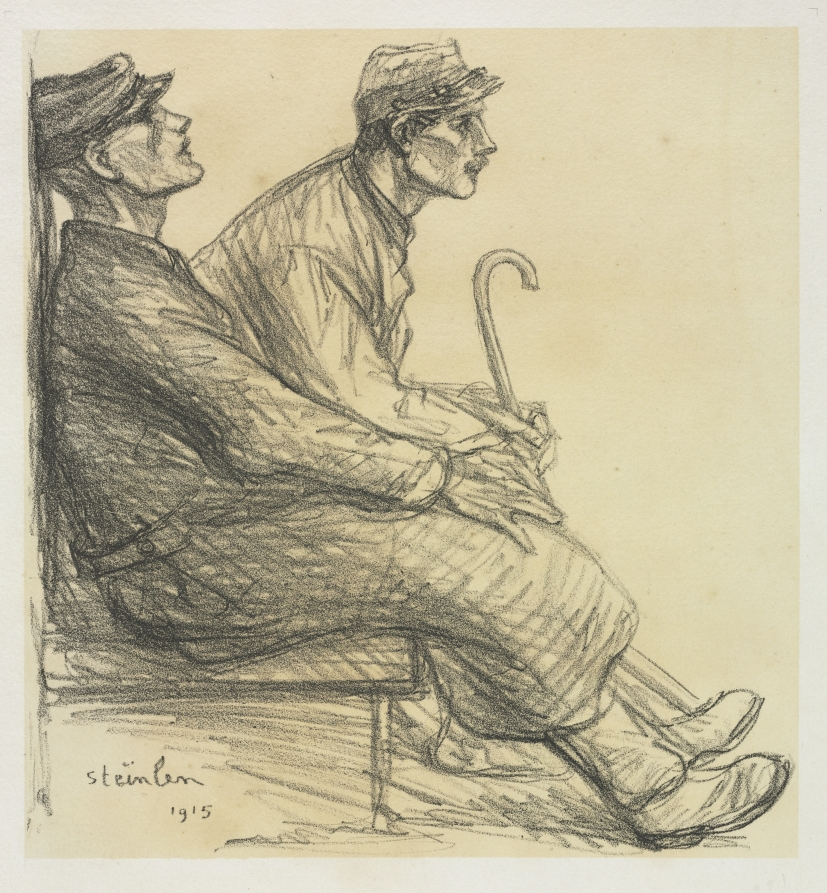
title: Convalescents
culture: Switzerland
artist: Théophile Alexandre Steinlen (Swiss, 1859–1923)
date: 1915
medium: lithograph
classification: Print